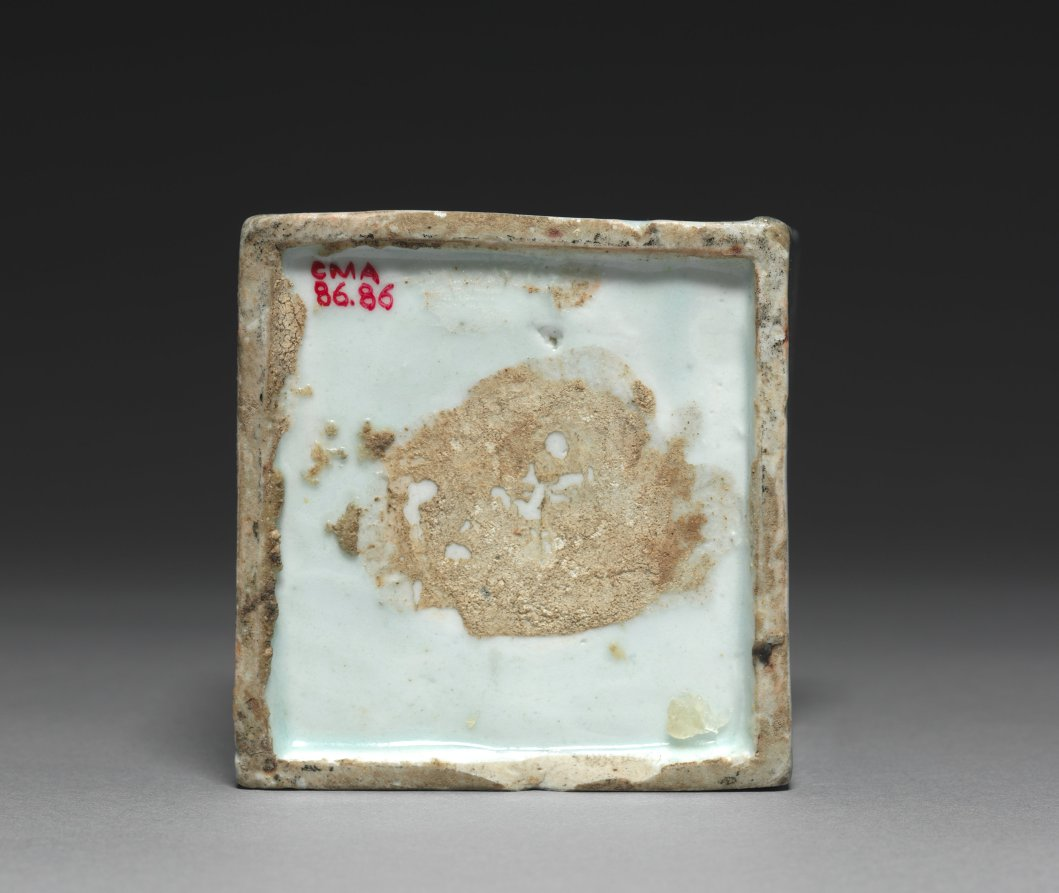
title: Square-shaped Bottle with the Scenery of the Han River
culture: Korea, Joseon dynasty (1392–1910)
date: 1800s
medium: porcelain with underglaze cobalt blue decoration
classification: Ceramic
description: The depicted scenery of this bottle is the Han River, the principal river crossing the center of Seoul. Since the 1700s, Korean artists began to paint the real landscape of Korea instead of imaginary ones of the Chinese tradition. This blue-and-white porcelain bottle is presumably a water dropper for ink. Each facet was separately made and put together before firing in a kiln. Both the landscape motif and faceted bottle were in vogue in the late 19th century, largely produced to meet the growing demand from the elite class.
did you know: The Han River is the principal river crossing the center of Seoul.